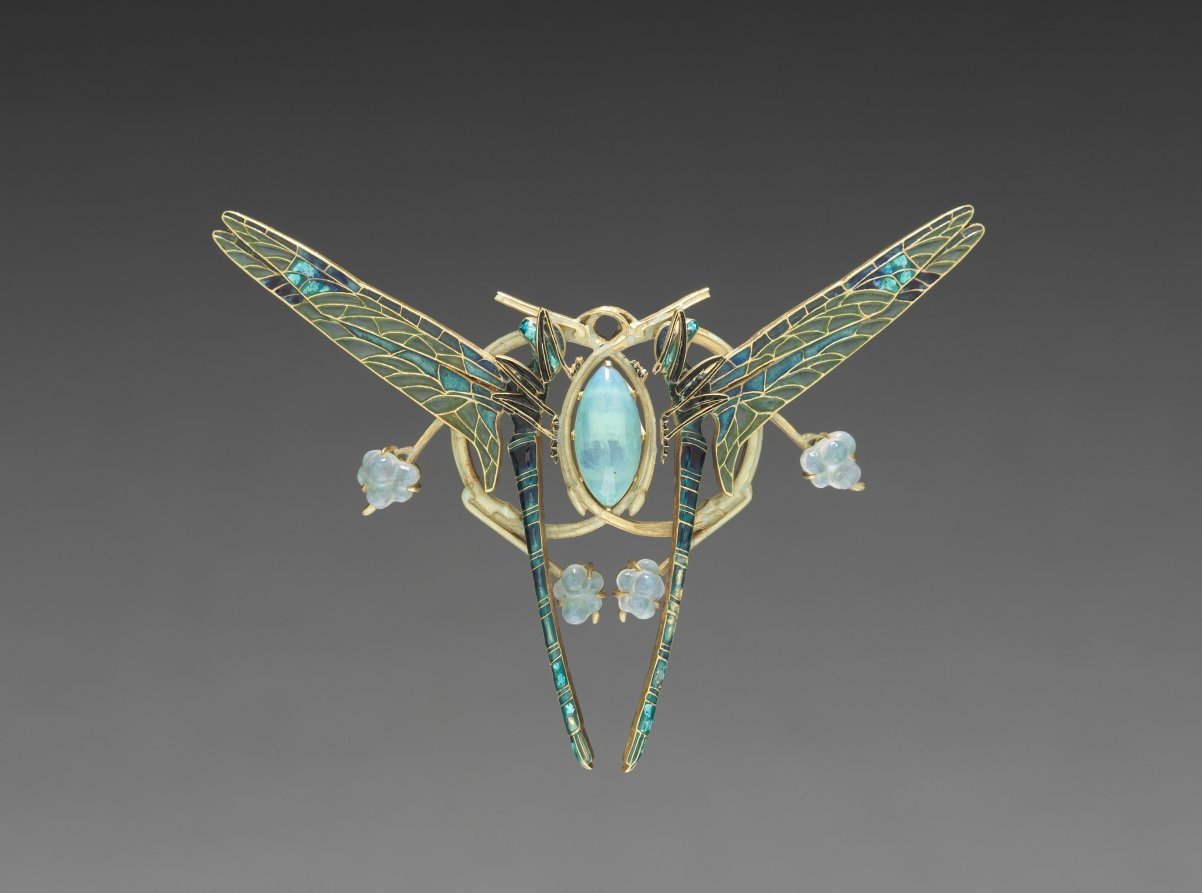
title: Dragon Fly Brooch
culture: France, late 19th-early 20th Century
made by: René Lalique (French, 1860–1945)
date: c. 1900–1910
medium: gold with plique-a-jour and cloisonne enamels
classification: Jewelry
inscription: inscribed on side of mount to the right: LALIQUE.